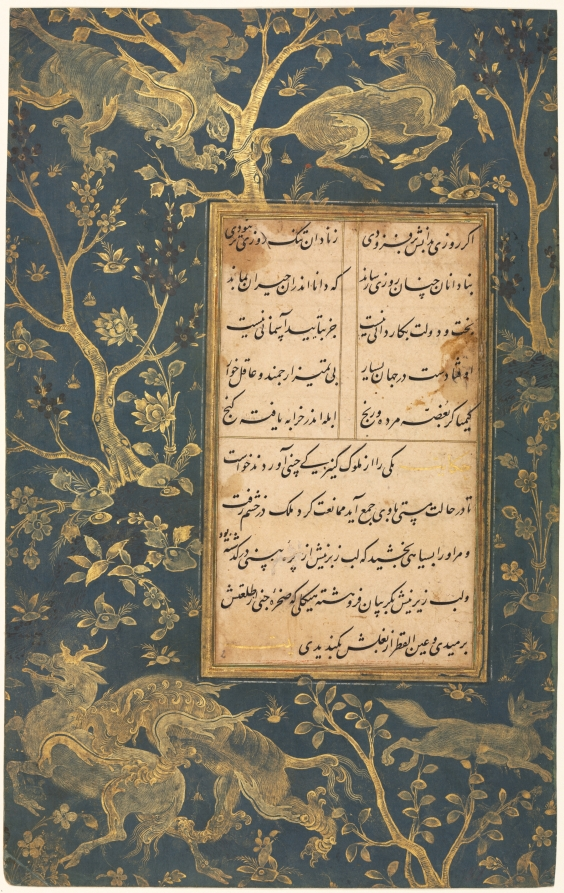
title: Illuminated folio (recto) from a Gulistan (Rose Garden) of Sa'di (c. 1213–1291)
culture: Iran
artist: Sultan 'Ali al-Mashadi (Iranian, 1430–1520)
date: calligraphy: c. 1475–1500; border: c. 1550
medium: Gum tempera, ink, gold, and silver on paper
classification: Manuscript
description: Silver and gold paints were used against an indigo blue background to create a fantastic frame for the text of the Gulistan. Meaning “rose bush” in Persian, this text is a collection of anecdotes in both verse and prose. Here, a winged lion chases a winged deer from the upper margins to the lower, where it rends the mythical deer and sends a toothy fox running.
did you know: Words in gold ink mark new sections, while the main text is written in black.